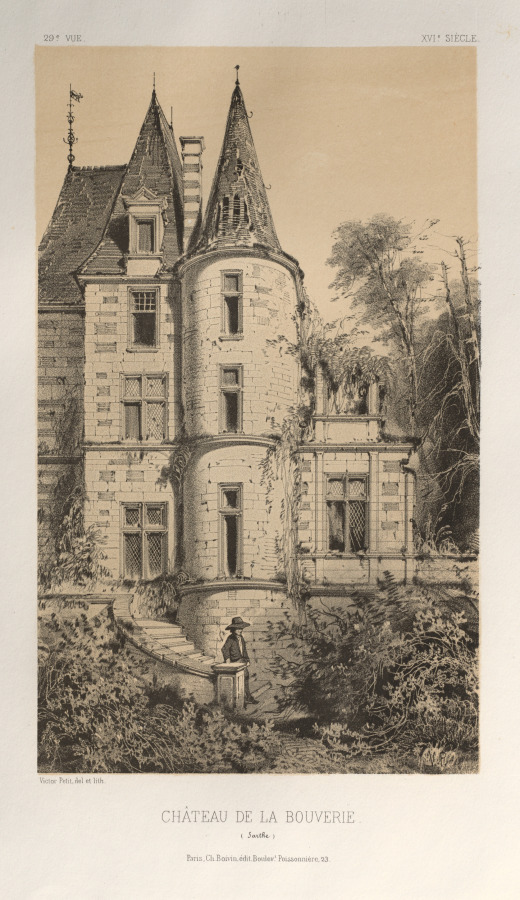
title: Architecture Pittoresque ou Monuments des xveme. Et xvieme. Siecles: Chateaux De France des XV et XVI Siecles: Pl. 29, Chateau De La Bouverie (Sarthe)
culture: France, 19th century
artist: Victor Petit (French, 1817–1874)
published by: Charles Boivin (publisher and editor); Lith de Godard a Paris (printer)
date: 1860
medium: lithograph with tint stone, from portfolio of 100 lithographs with tint stone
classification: Print